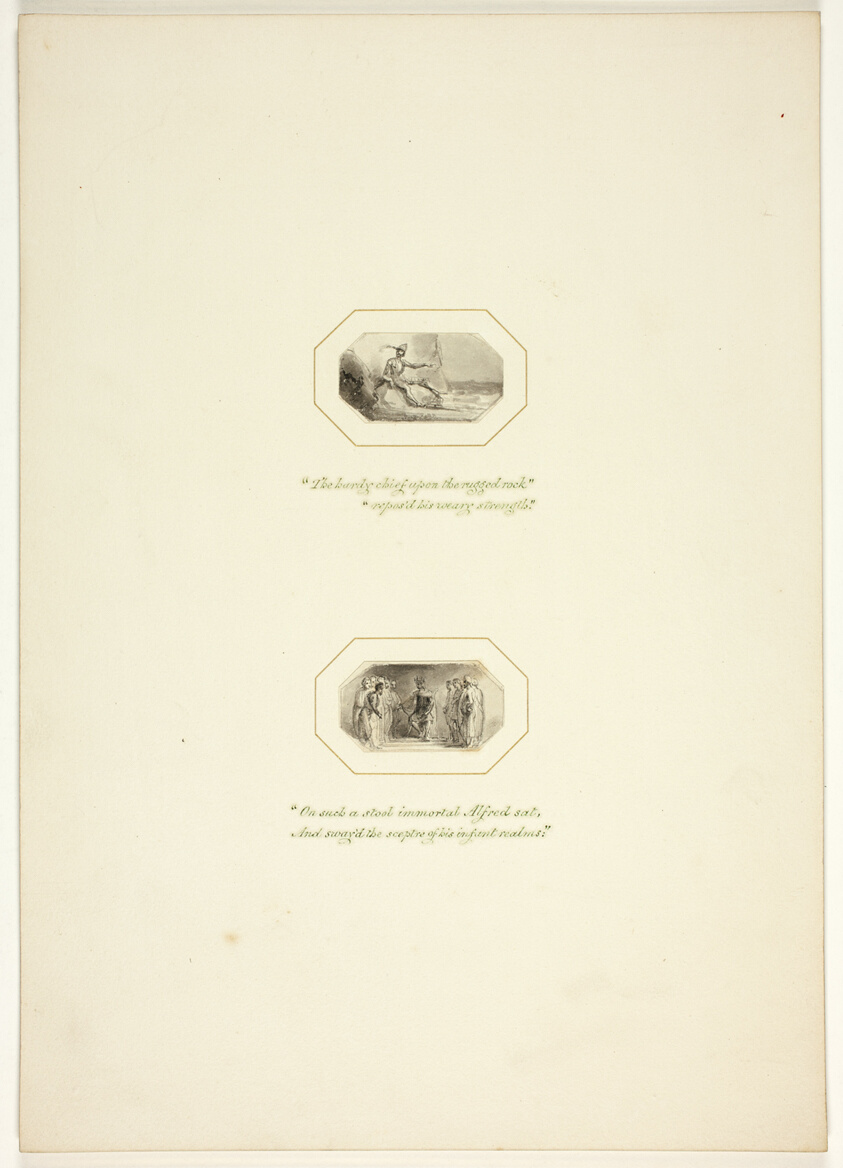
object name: Drawing and Watercolor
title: Study for a plate from The Task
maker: Thomas Stothard (English, 1755-1834)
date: c. 1800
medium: Ink wash on paper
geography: England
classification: ink or chalk wash; drawings (visual works); prints and drawing